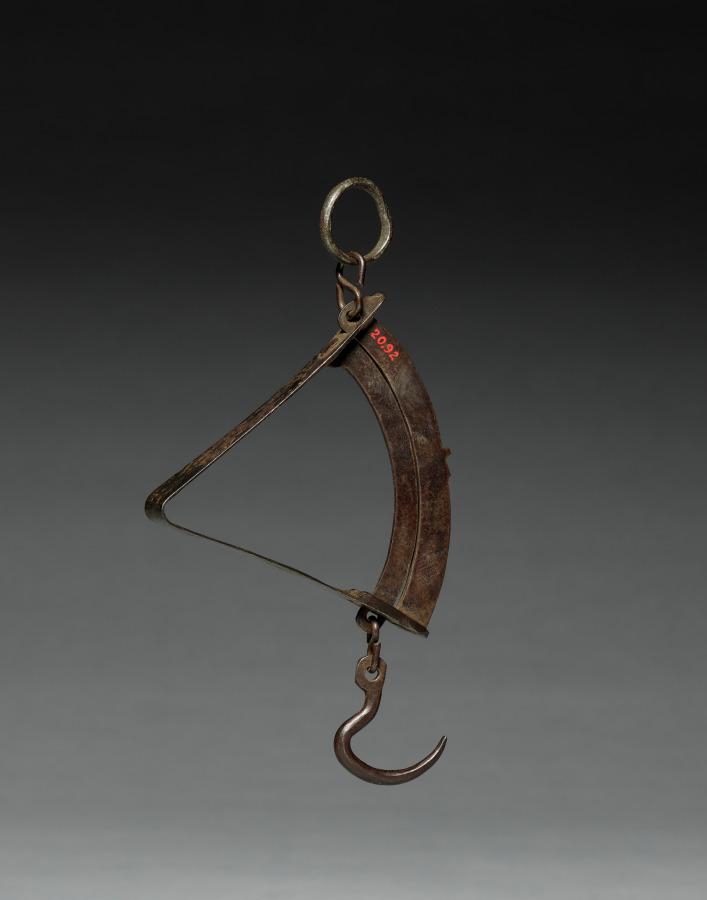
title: Hand Scale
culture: Europe, 18th century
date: 1700s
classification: Tool